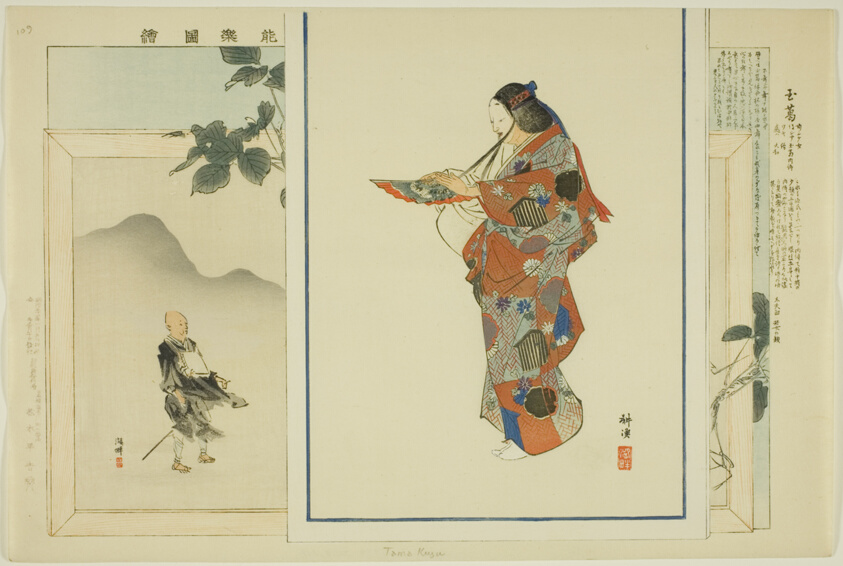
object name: Print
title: Tama Kuzu, from the series "Pictures of No Performances (Nogaku Zue)"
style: Japanese (culture or style)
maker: Tsukioka Kogyo; Japanese, 1869-1927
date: 1898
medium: Color woodblock print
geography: Japan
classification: woodblock print; print; asian art